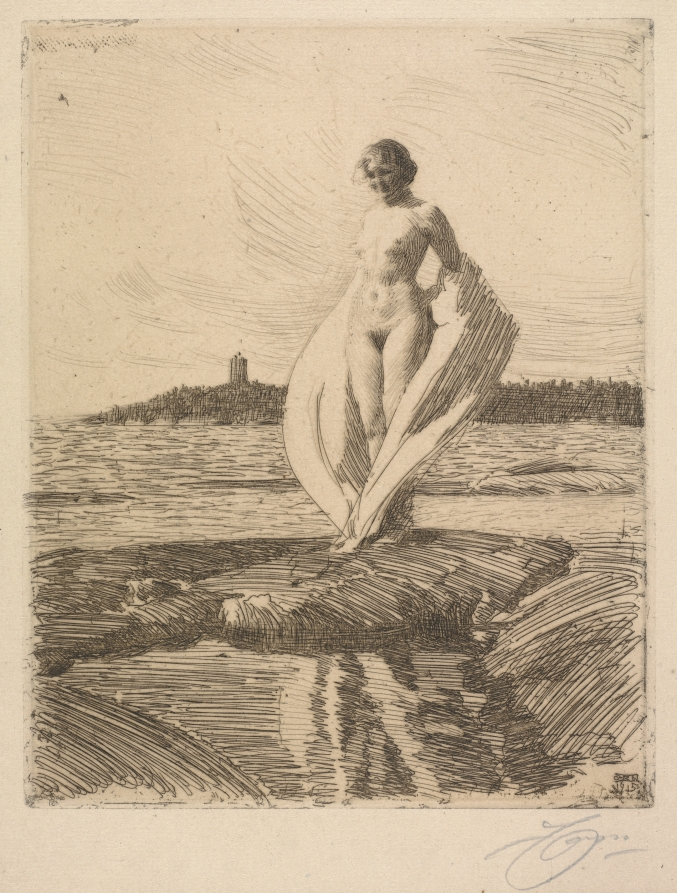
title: The Swan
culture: Sweden, 20th century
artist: Anders Zorn (Swedish, 1860–1920)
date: 1915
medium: etching and drypoint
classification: Print